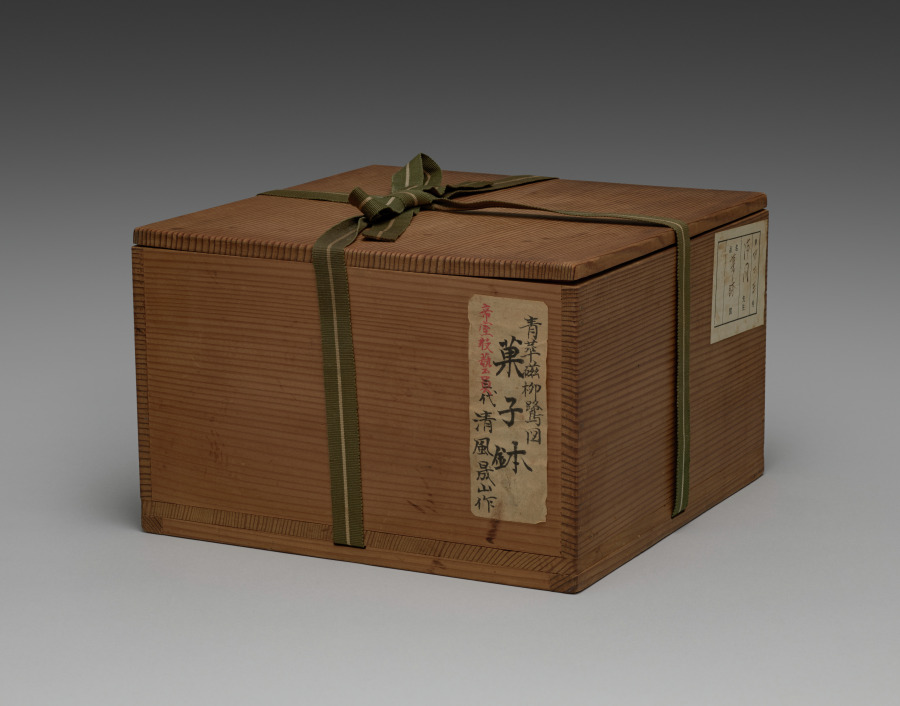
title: Sweets Bowl with Egrets and Willow in Snow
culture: Japan, Meiji period (1868–1912)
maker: Seifū Yohei III (Japanese, 1851–1914)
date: 1912–14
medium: Porcelain with underglaze blue and iron oxide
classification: Ceramic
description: For this sweets bowl, Yohei III designed a dramatic surround of egrets in a willow tree under heavy snow. The entire design is painted in cobalt blue under the transparent glaze. If one turns the bowl clockwise, two egrets come into view, one after the other. As they ascend, both struggle against the wind amid snow-laden weeping willow branches. They are followed by a stretch of willow branches that evoke the bitter cold. The sky is painted with blue washes all around the designs. The imagery culminates in a group of three egrets huddled together in the crotch of the tree. Of course, it is also possible to read the scene in the other direction, in which case the sheltering egrets look toward one of the flying egrets, who looks back at them, and it is the egret with wings outspread, looking directly down, who concludes the scene. Two thin bands of blue set off the design just under the bowl’s rim, and a band of brown iron oxide runs along the rim. Another two bands of blue run around the middle of the foot. The inside of the bowl’s box lid has an attestation by Yohei IV that it is the work of Yohei III.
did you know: This sweets bowl requires someone to rotate it to experience the birds observing one another.